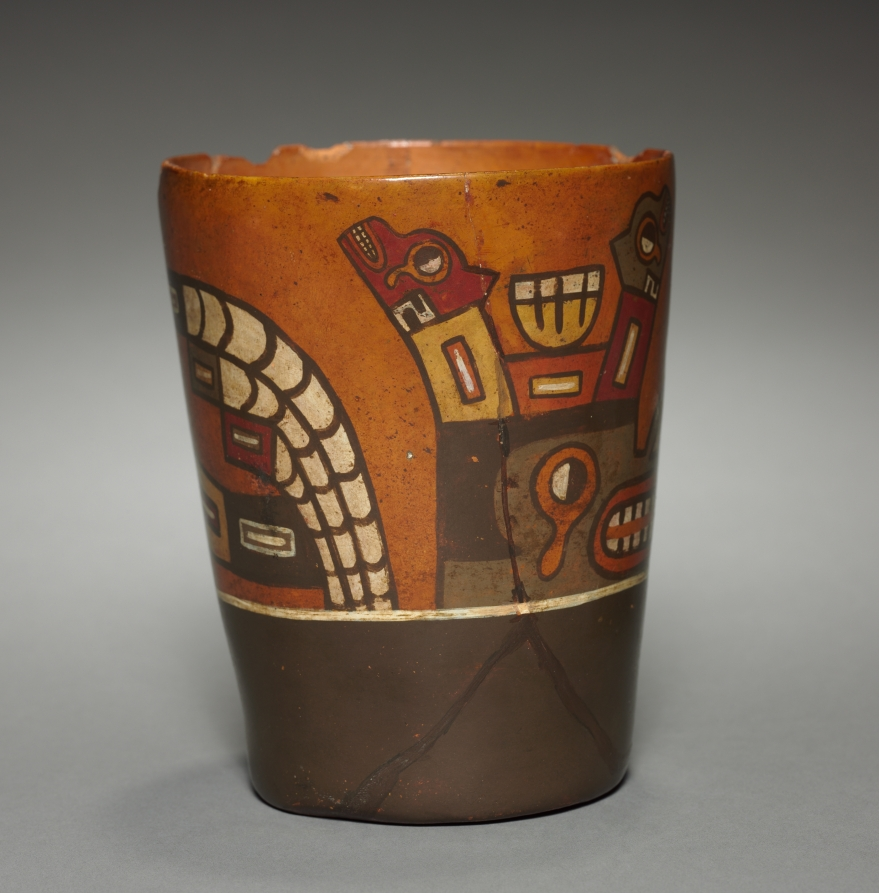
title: Kero-shaped Vessel (modern version of a Wari-style vessel)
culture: Peru, modern, 20th century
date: before 1955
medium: pottery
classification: Forgery